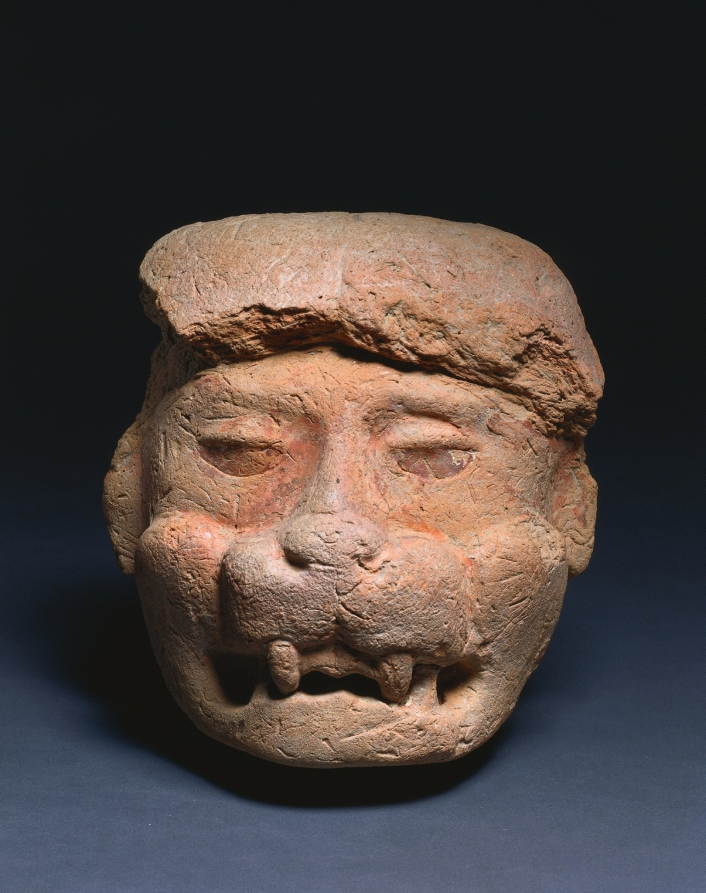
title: Architectural Sculpture Fragment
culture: Mexico, Oaxaca, Zapotec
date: c. 700–1000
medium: unfired clay, covered with painted stucco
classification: Ceramic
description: This architectural sculpture fragment probably once formed part of a tomb façade; technically similar sculptures have been found at the Zapotec site Lambityeco. Ancestral tombs were usually located beneath the courtyard of the family home and were often reused for successive generations. This image of a man wearing a feline mask over the lower face may portray a lineage founder.